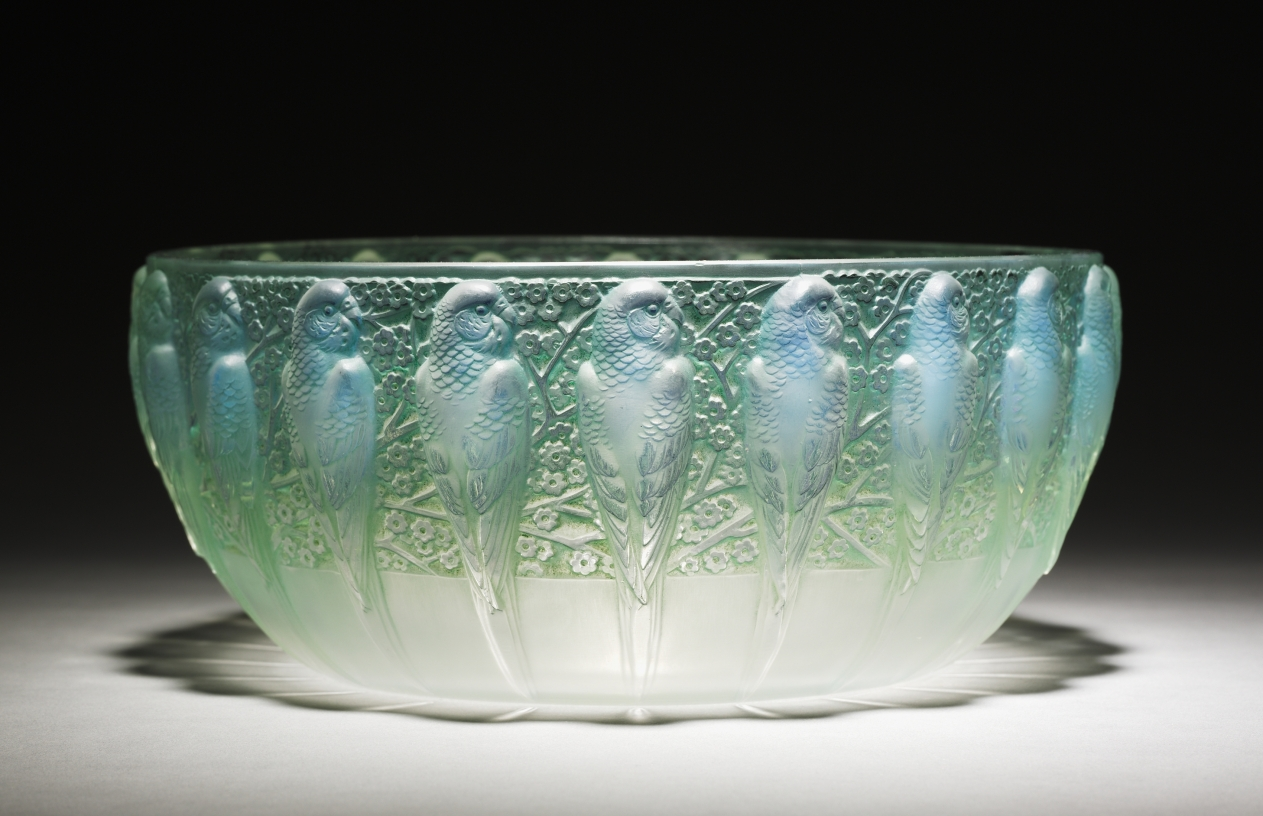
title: Parakeets (Perruches) Bowl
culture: France, 20th century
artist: René Lalique (French, 1860–1945)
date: 1931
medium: glass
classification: Glass